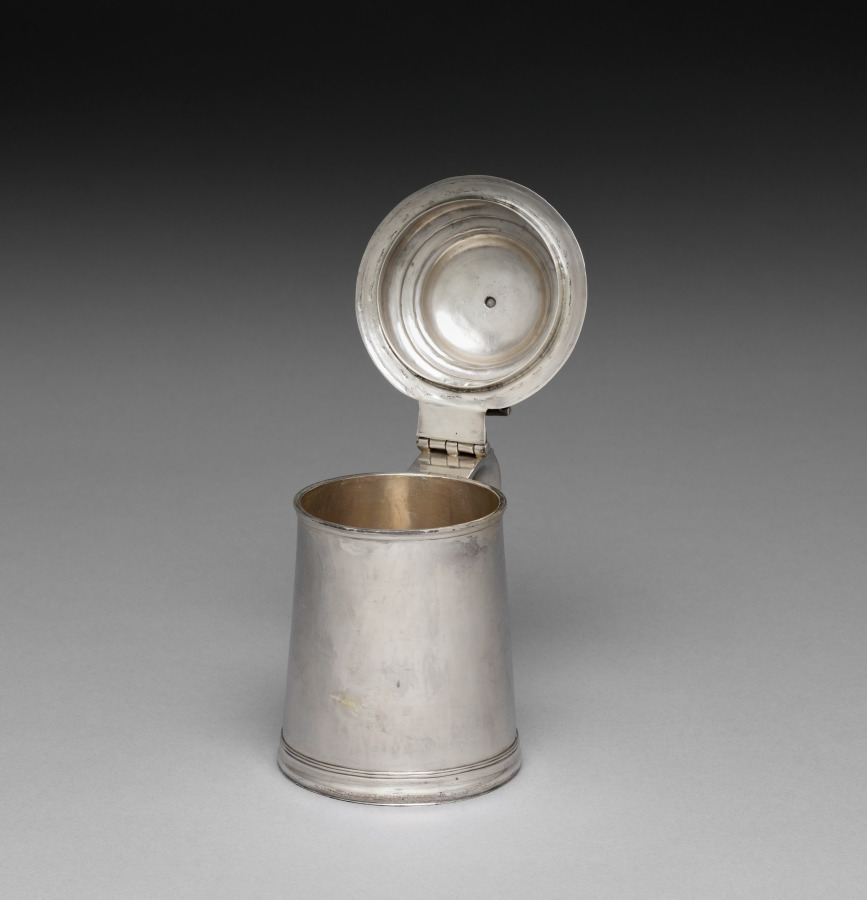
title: Tankard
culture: America, Massachusetts, Boston, early 18th century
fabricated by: John Edwards (British)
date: 1715–1720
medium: silver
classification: Silver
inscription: Engraved on handle: "SB to RA".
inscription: Stamped on side: "IE".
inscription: Engraved underside: "B" above "S.C".